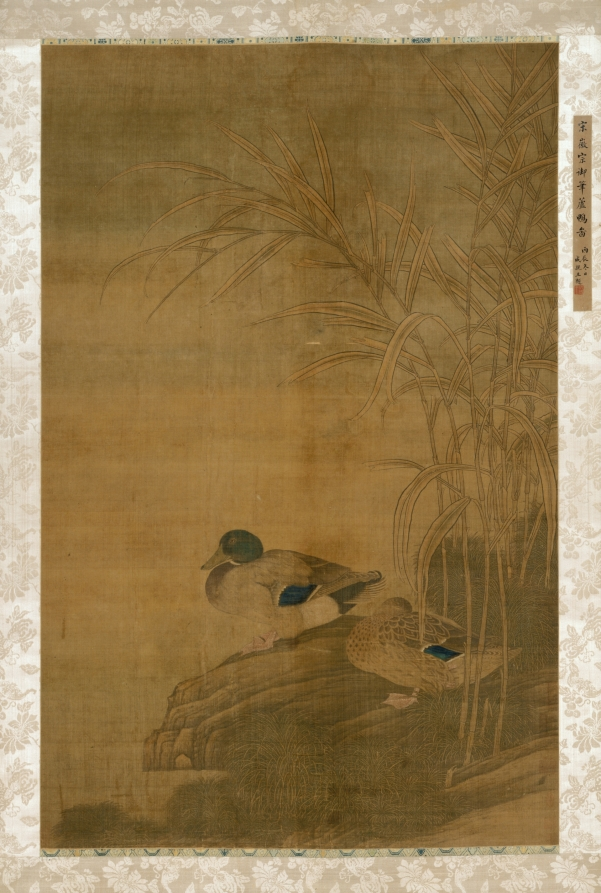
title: Ducks under Reeds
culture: China, Ming dynasty (1368–1644)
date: 1400s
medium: hanging scroll, ink and color on silk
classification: Painting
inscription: 1 label on mounting, dated 1796, by Yong Xing 永瑆 (Prince Cheng 成亲王, 1752-1823)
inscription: 7 seals: 1 of Song Luo 宋犖 (1634-1713); 1 of Gong Erduo 宮爾鐸 (b. 1838); 5 unidentified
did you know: The artist realistically represented that the Mandarin duck is a sexually dimorphic species, meaning males and females differ in appearance.